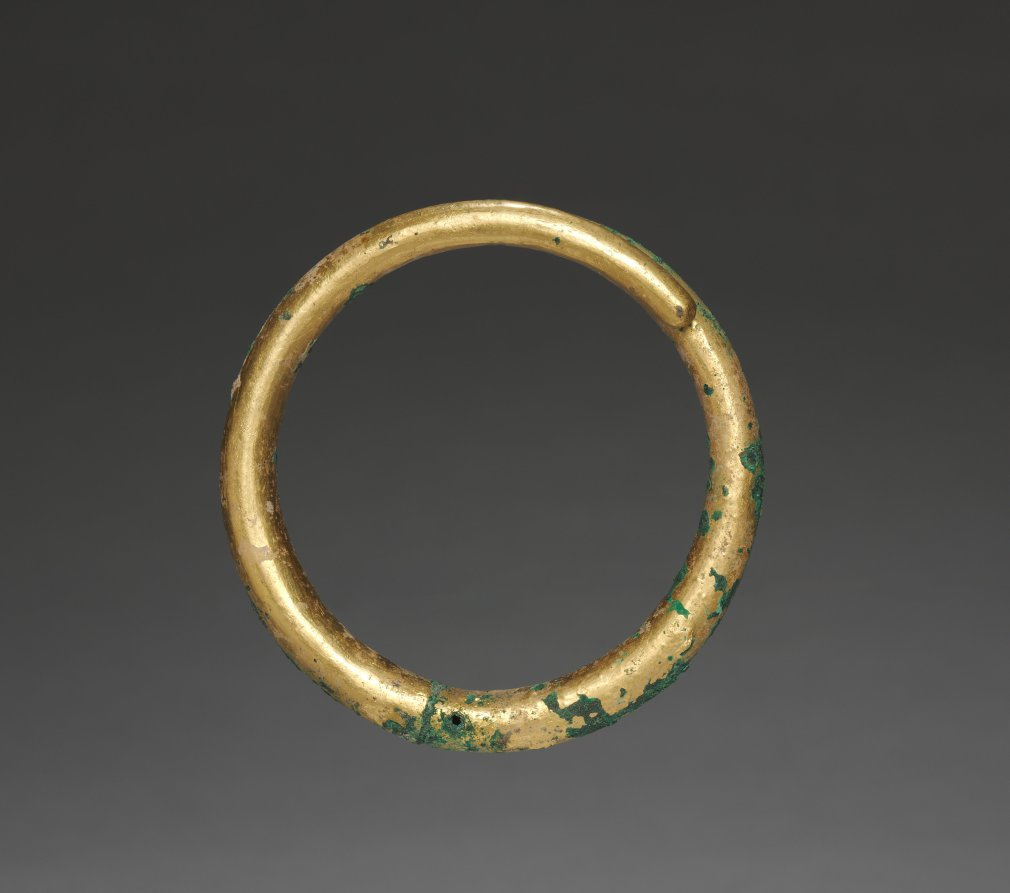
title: Bangle (1 of 2)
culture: India, Shunga period (185–78 BCE)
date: 185–72 BCE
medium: gilt bronze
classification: Jewelry